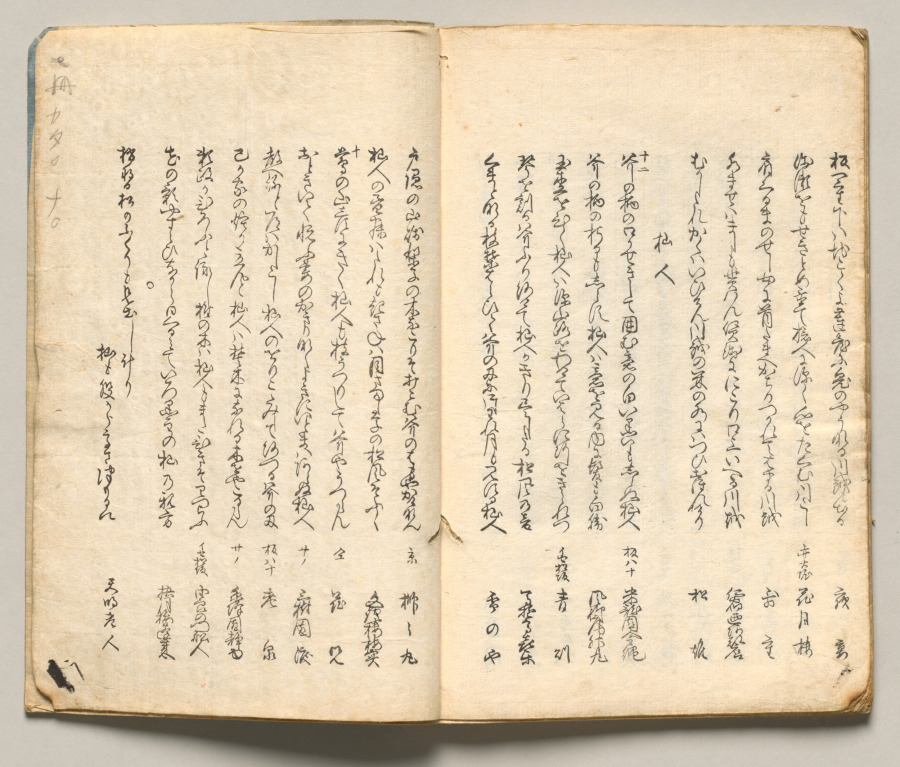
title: Spread Nineteen from Volume Seven of People of Japan in Light Verse (Kyōka)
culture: Japan, Edo period (1615–1868)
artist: Utagawa Hiroshige (Japanese, 1797–1858)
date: 1857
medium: Woodblock-printed book; ink and color on paper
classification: Bound Volume